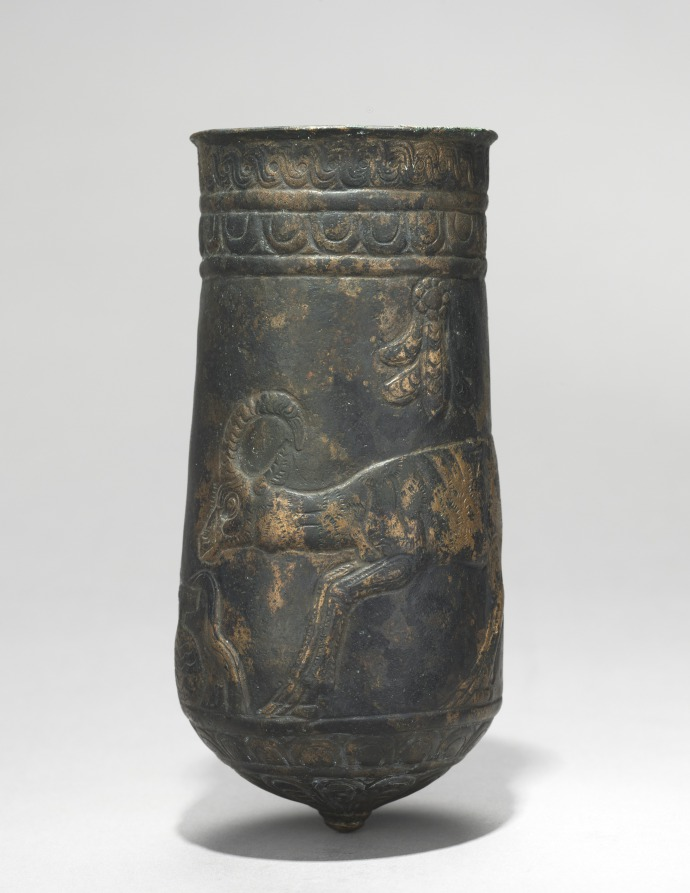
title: Button-Based Situla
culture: Iran, Luristan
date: 900–700 BCE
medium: bronze, repoussé, punched, incised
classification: Metalwork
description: The metalworkers of Luristan provided the Assyrian empire with elaborate bronze ornaments and vessels. These two situla are decorated symmetrically---one with ibexes drinking from an overflowing water jar; the other, with sphinxes.